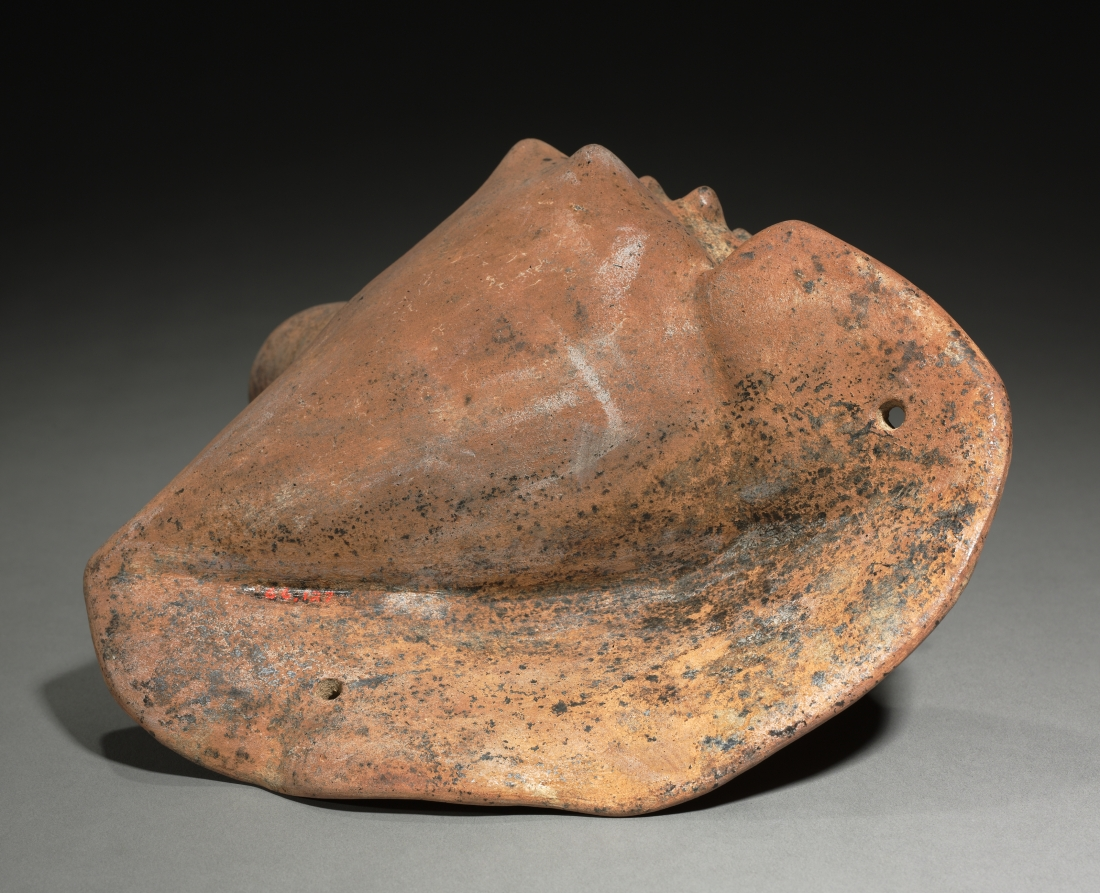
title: Conch Shell Trumpet Vessel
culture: West Mexico, Colima, Comala style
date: 200 BCE–300 CE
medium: earthenware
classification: Ceramic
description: Conch shell trumpets were used during many kinds of important events throughout the ancient Americas. The shells were converted to trumpets by removing the tip to form a mouthpiece, as this ancient ceramic replica of a trumpet shows. Holes were often drilled in the shell for a carrying cord.